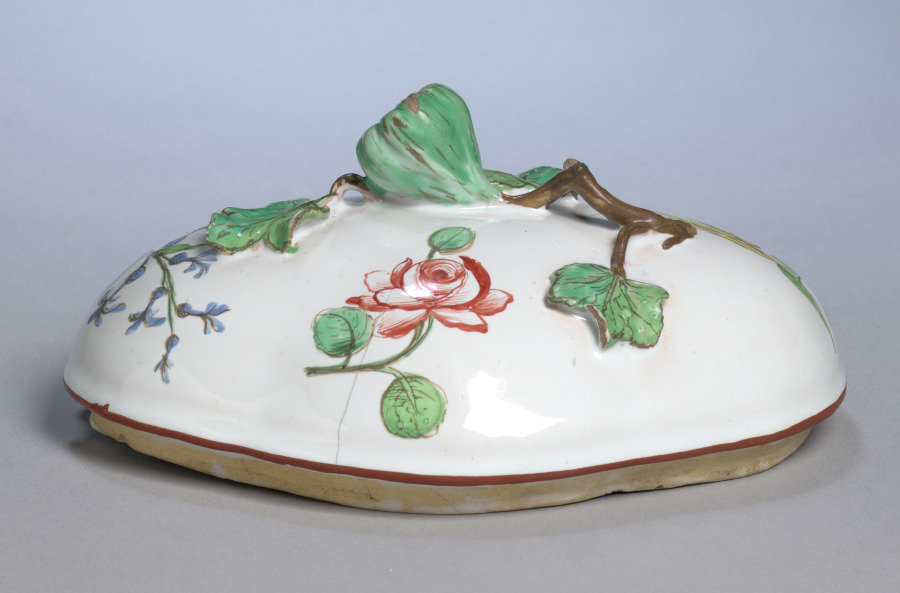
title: Sugar Basin (lid)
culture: France, 18th century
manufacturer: Sceaux Factory (French, active 1748–66)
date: c. 1750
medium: faience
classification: Ceramic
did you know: In medieval Italian churches, painted altarpieces served as a focal point for worshippers during the rituals of faith. The figures of Jesus, Mary, and eight saints are framed by a golden background that would have glistened in the flickering candlelight of the church.